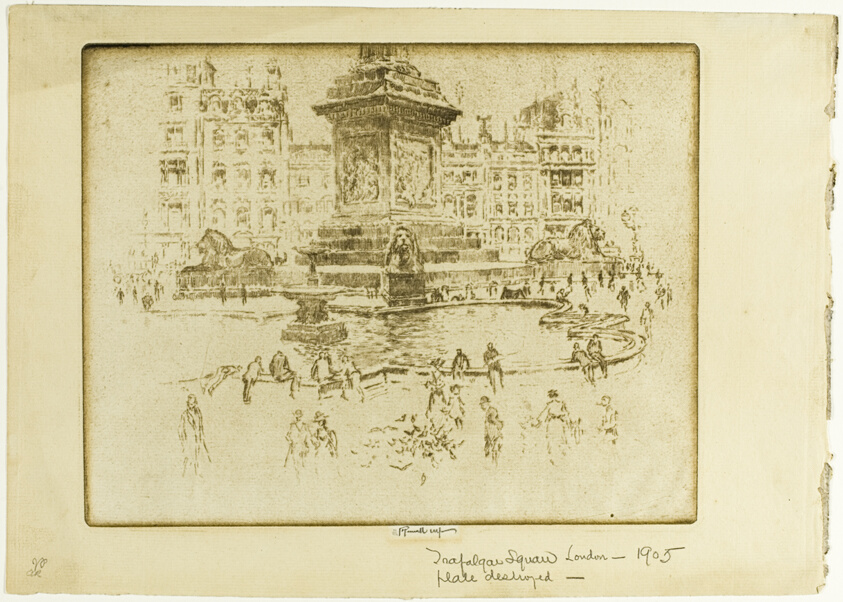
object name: Print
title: Trafalgar Square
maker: Joseph Pennell (American, 1857-1926)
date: 1903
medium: Etching in sepia ink on ivory laid paper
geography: United States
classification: etching; prints and drawing; print